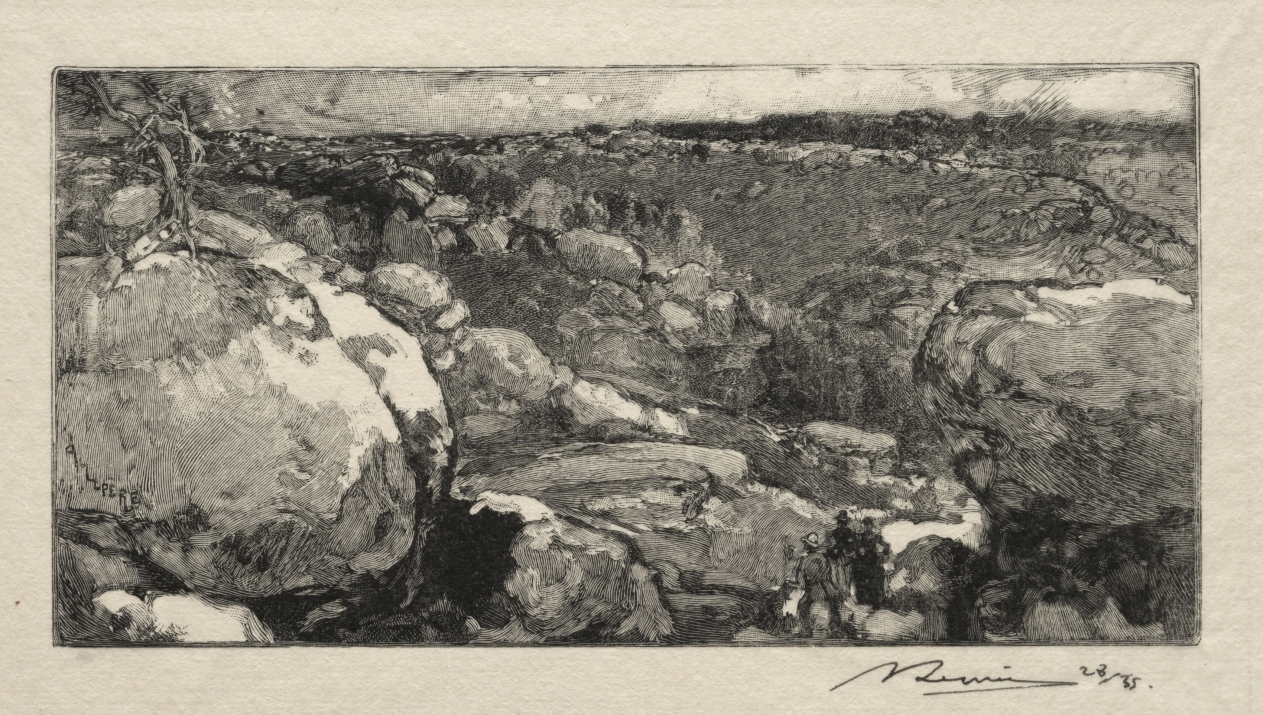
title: Le cirque du Long- Rocher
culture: France, 19th-20th century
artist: Auguste Louis Lepère (French, 1849–1918)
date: 1888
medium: wood engraving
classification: Print